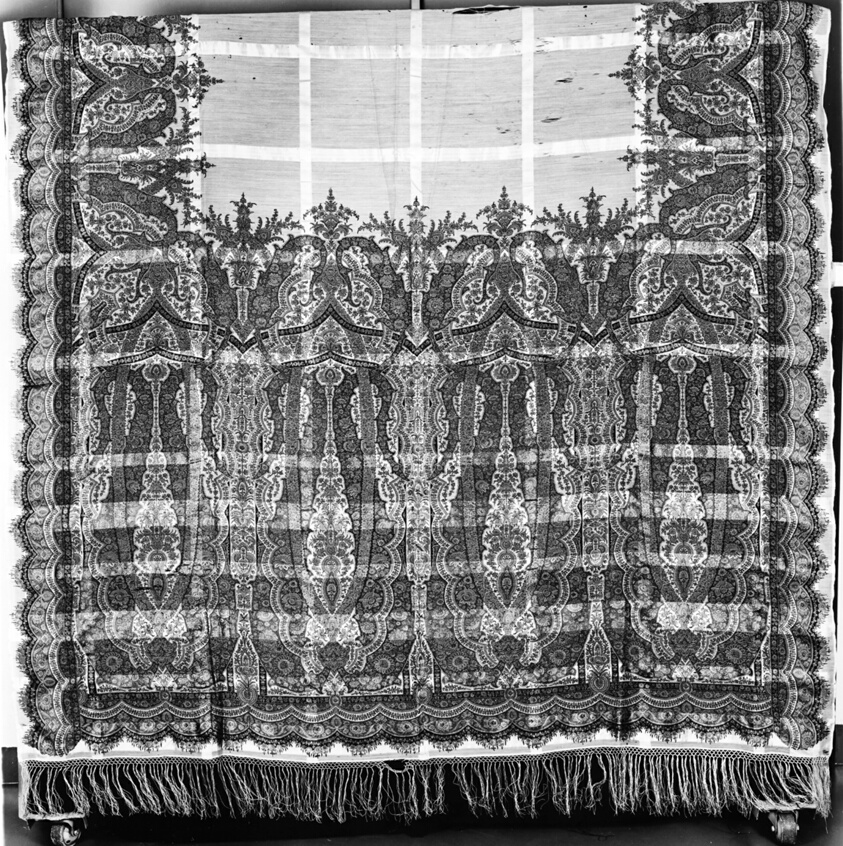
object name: Textile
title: Long Shawl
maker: France, England, Norwich, or Scotland, Paisley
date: 1850/75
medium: Wool and silk, stripes of 1:1 plain gauze weave and stripes of warp-float faced 3:1 'S' twill weave; block printed; attached silk fringe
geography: Norwich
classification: textile; weaving - printed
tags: lattices